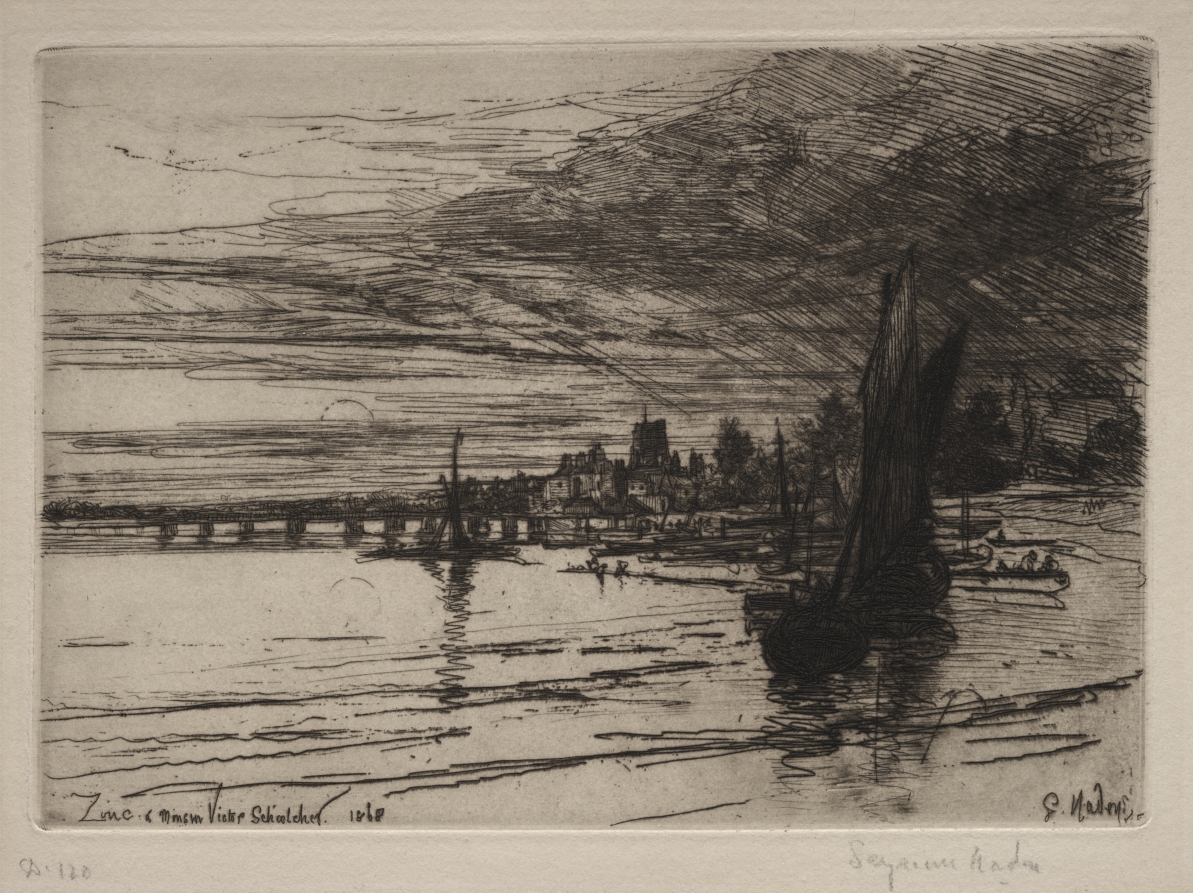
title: Battersea Bridge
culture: England, 19th century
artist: Francis Seymour Haden (British, 1818–1910)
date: 1868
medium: etching and drypoint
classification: Print